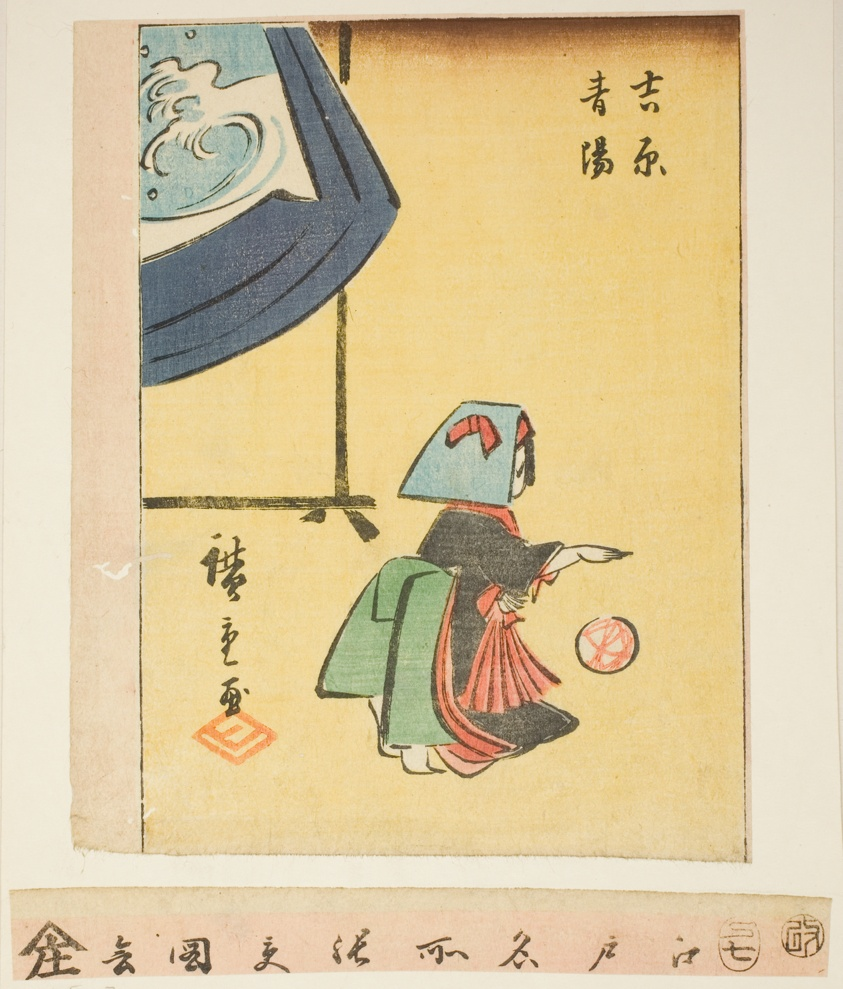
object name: Print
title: New Year in Yoshiwara (Yoshiwara seiyo), section of a sheet from the series "Cutout Pictures of Famous Places in Edo (Edo meisho harimaze zue)"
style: Japanese (culture or style)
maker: Utagawa Hiroshige 歌川 広重; Japanese, 1797-1858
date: 1857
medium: Color woodblock print; section of harimaze sheet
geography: Japan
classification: woodblock print; print; asian art